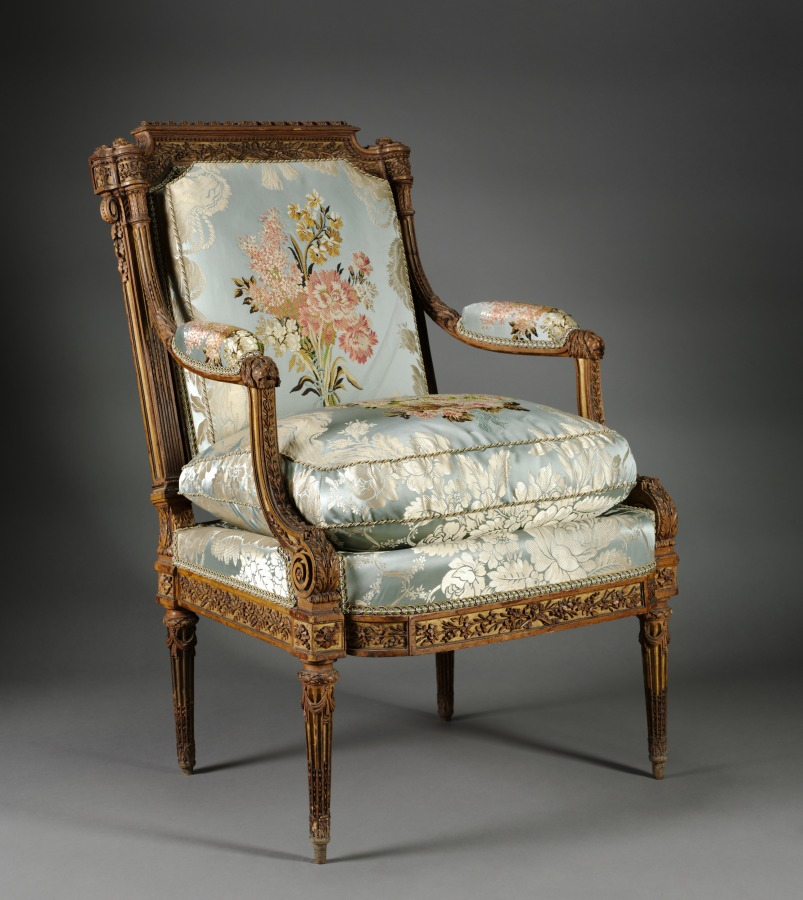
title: Pair of Armchairs (Fauteuil)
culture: France, 18th century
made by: Nicolas-Denis Delaisement (French)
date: c. 1785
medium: boxwood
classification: Furniture and woodwork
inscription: signed on back of frame of seat underneath: Delaisement with inverted "s."